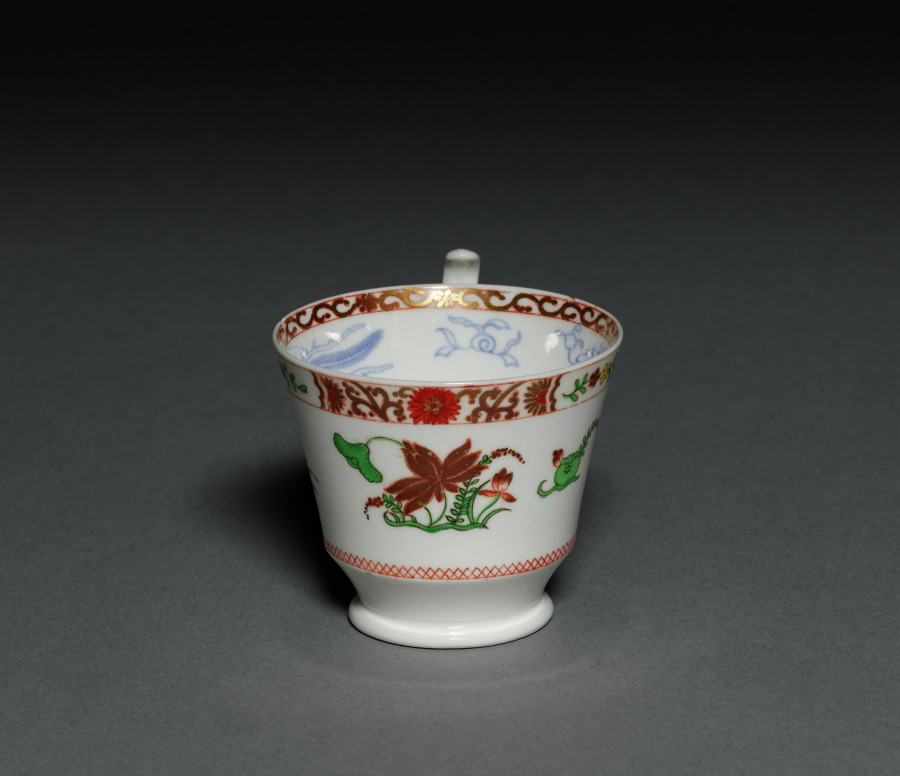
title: Cup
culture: England, Staffordshire, 18th-19th century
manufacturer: Spode Factory (British)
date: 1700s-1800s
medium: porcelain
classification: Ceramic